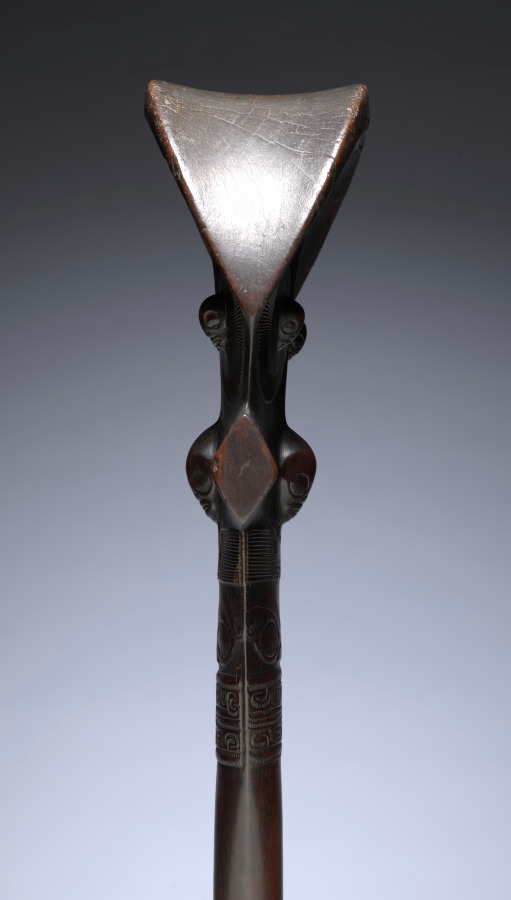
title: War Club ('U'u)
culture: Polynesia, Marquesas Islands, early 19th Century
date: early 1800s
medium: stained ironwood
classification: Sculpture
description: The head of this war club is carved as an abstract face, with small additional faces appearing at the eyes, nose, and forehead. Low-relief patterns encircle the club's neck. Fashioned from dense-grained ironwood (casuarina) or toa wood, the club is quite heavy. Like stilt footrests, war clubs were carved by expert artists (tahuna) and cured in the mud of a taro patch. The glossy finish is the result of regular rubbing and polishing with scented coconut oil. Similar war clubs were seen and recorded by the crew of Captain Cook's second voyage to the South Seas in 1772-75.